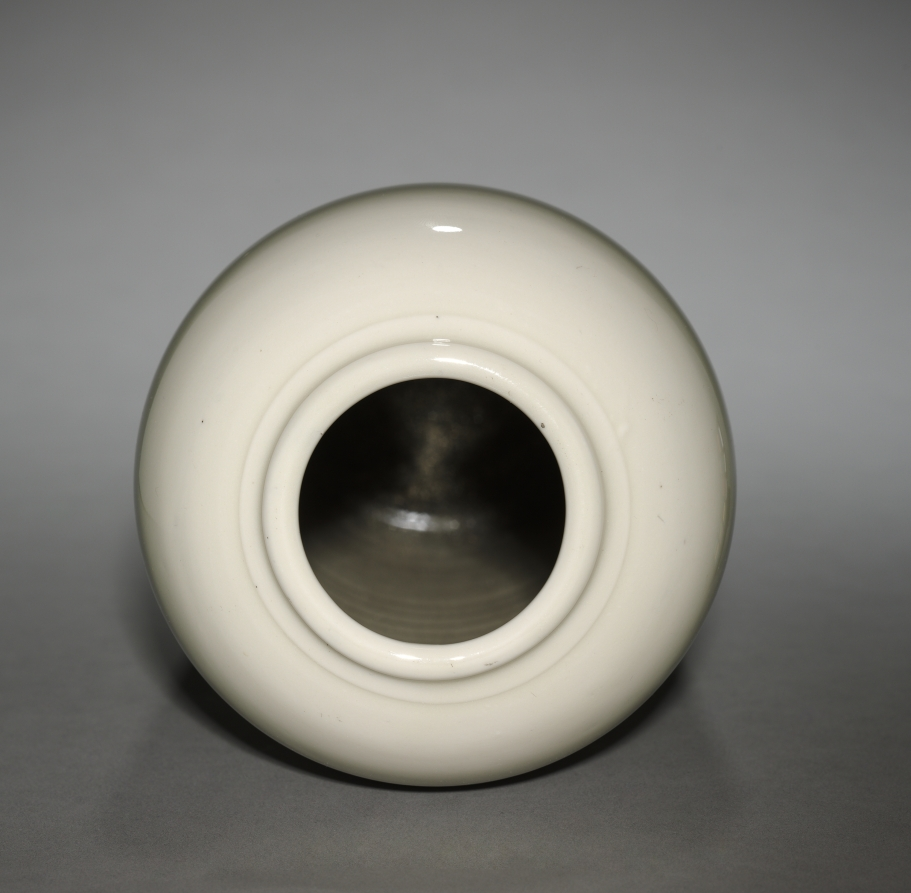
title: Vase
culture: China, Qing dynasty (1644-1911)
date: 1644–1911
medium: porcelain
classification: Ceramic